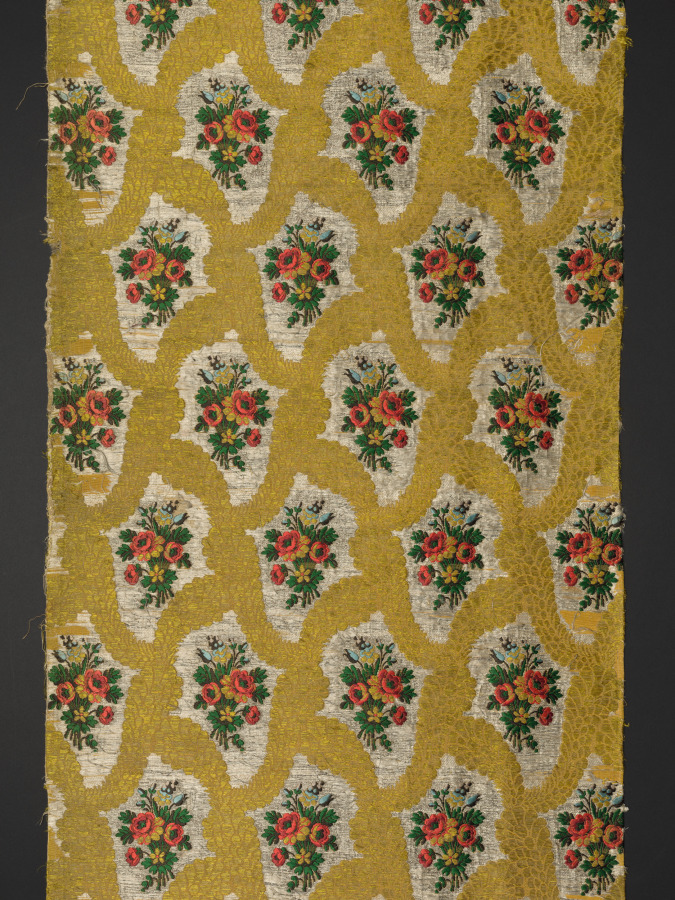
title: Coverlet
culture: Italy, 18th century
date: 1700s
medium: silk, metallic thread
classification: Textile